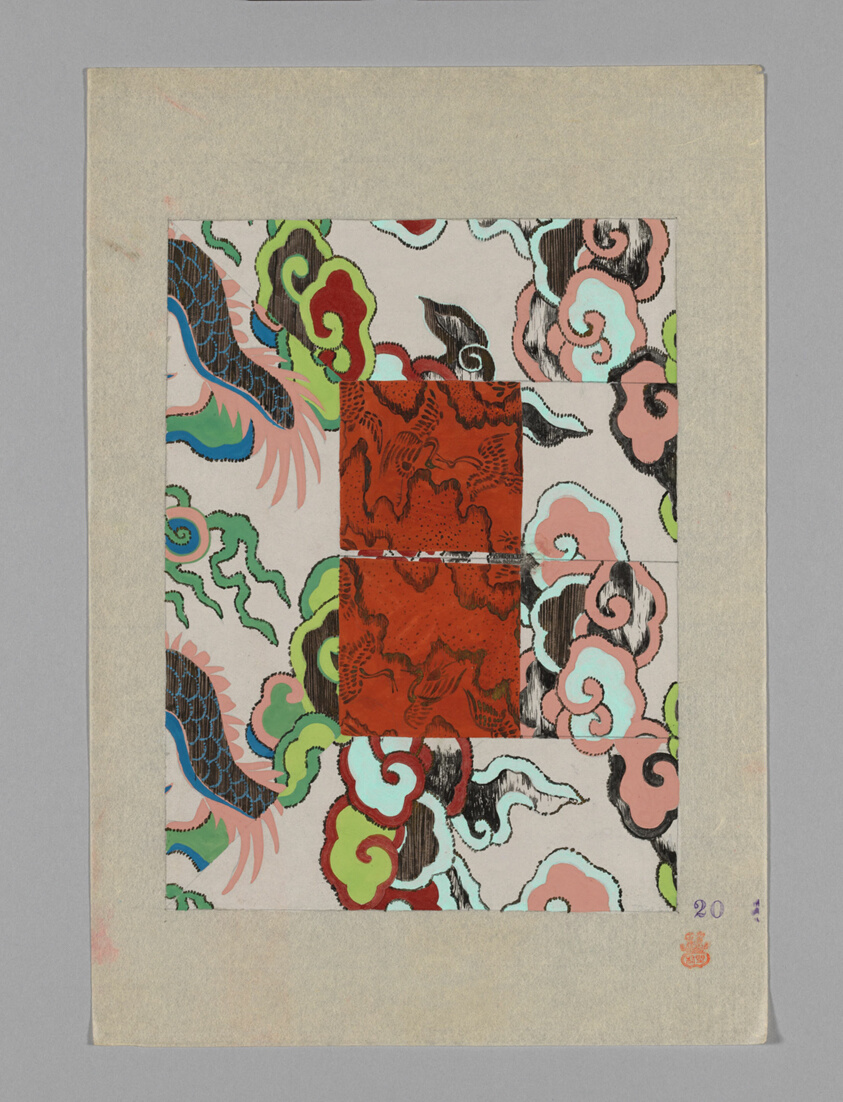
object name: Drawing and Watercolor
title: Design on Paper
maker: Japan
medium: Paper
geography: Japan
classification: textile; accessory - paper design; paper; watercolor